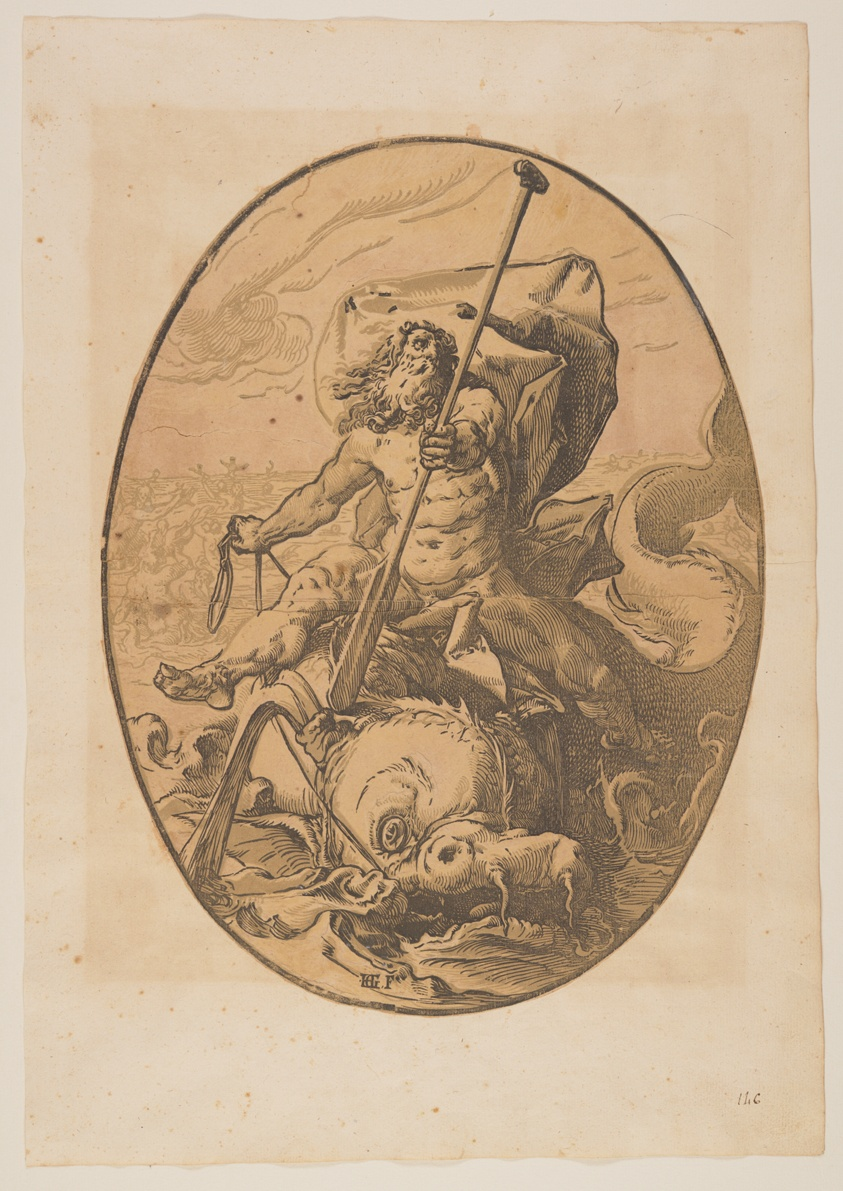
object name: Print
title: Oceanus, from The Deities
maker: Hendrick Goltzius (Dutch, 1558–1617)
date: 1588/90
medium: Chiaroscuro woodcut from three blocks in beige-green on ivory laid paper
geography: Netherlands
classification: print; paper; prints and drawing; woodcut